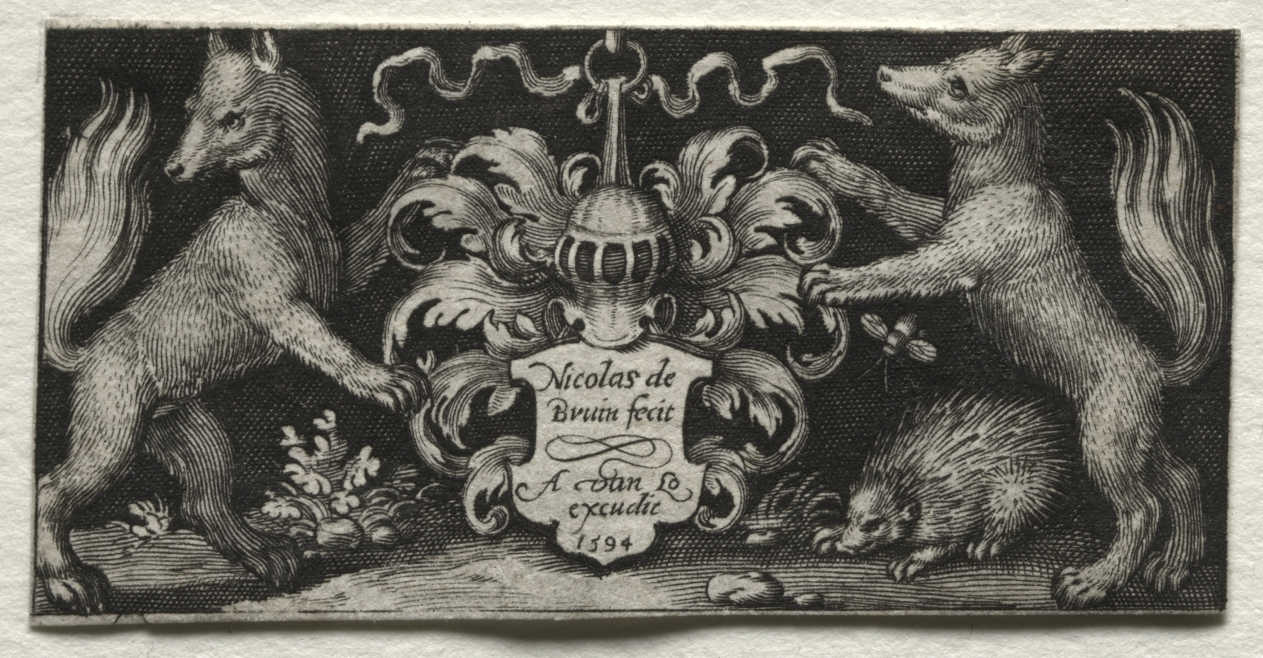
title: Coat of Arms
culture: Netherlands, 16th century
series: Fighting Chimeras and Scenes to Aesop's Fables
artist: Nicolaes de Bruyn (Netherlandish, 1571–1656)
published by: A. van Londerseel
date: 1594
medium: engraving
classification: Print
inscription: lower center, in shield, in plate: Nicolas de / Bruin fecit / A van Lo / excudit / 1594 ; VERSO, lower left, in graphite: B4241 ; lower center, in graphite: 9[circled] FPO ; lower right, in graphite: 6264/130